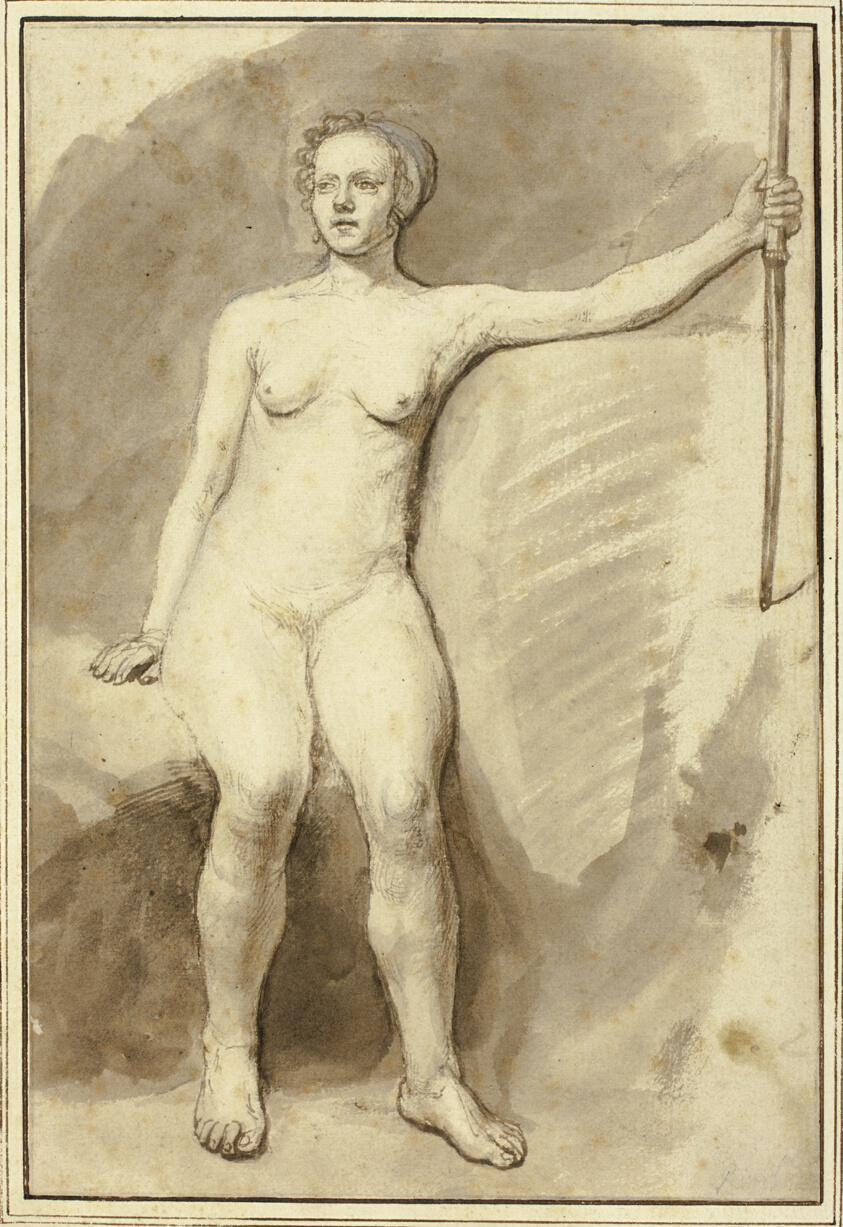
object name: Drawing and Watercolor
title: Seated Female Nude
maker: Samuel van Hoogstraten (Dutch, 1627-1678)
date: 1647/78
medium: Pen and brown ink and brush and brown wash, with traces of black chalk and opaque white watercolor, on cream laid paper, laid down on cream laid paper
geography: Holland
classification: pen and ink drawings; drawings (visual works); prints and drawing